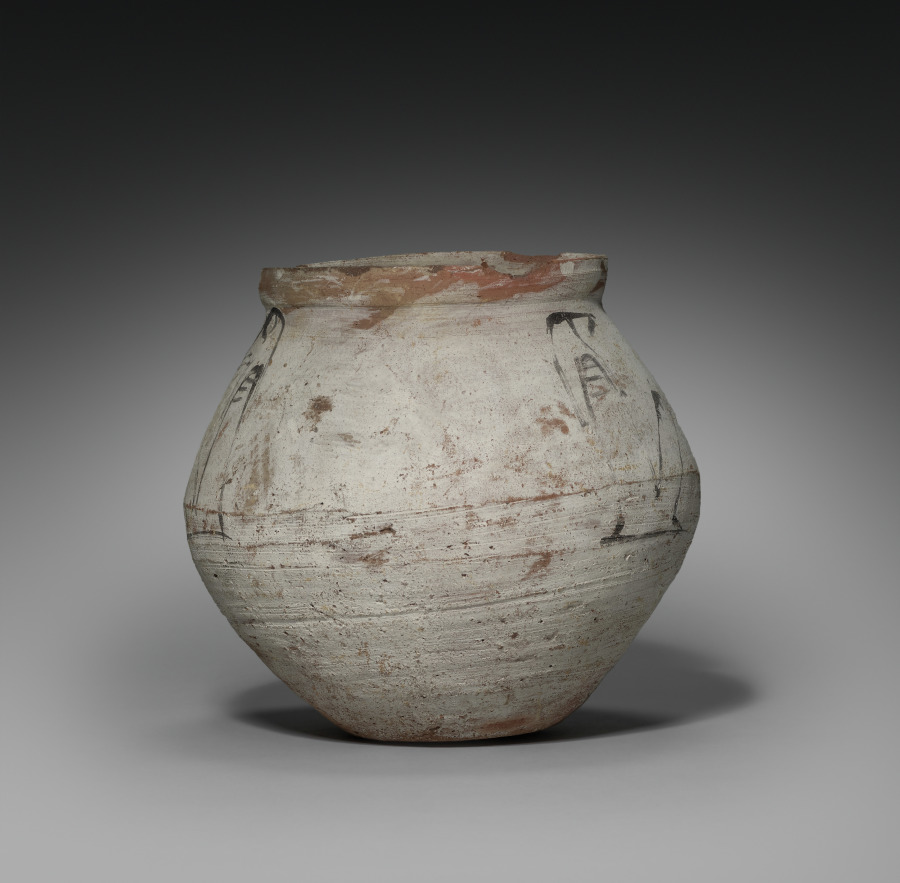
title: Shawabty Jar with Lid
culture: Egypt, New Kingdom (1540–1069 BCE), Dynasties 19–20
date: 1295–1069 BCE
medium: Nile silt ware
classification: Funerary Equipment